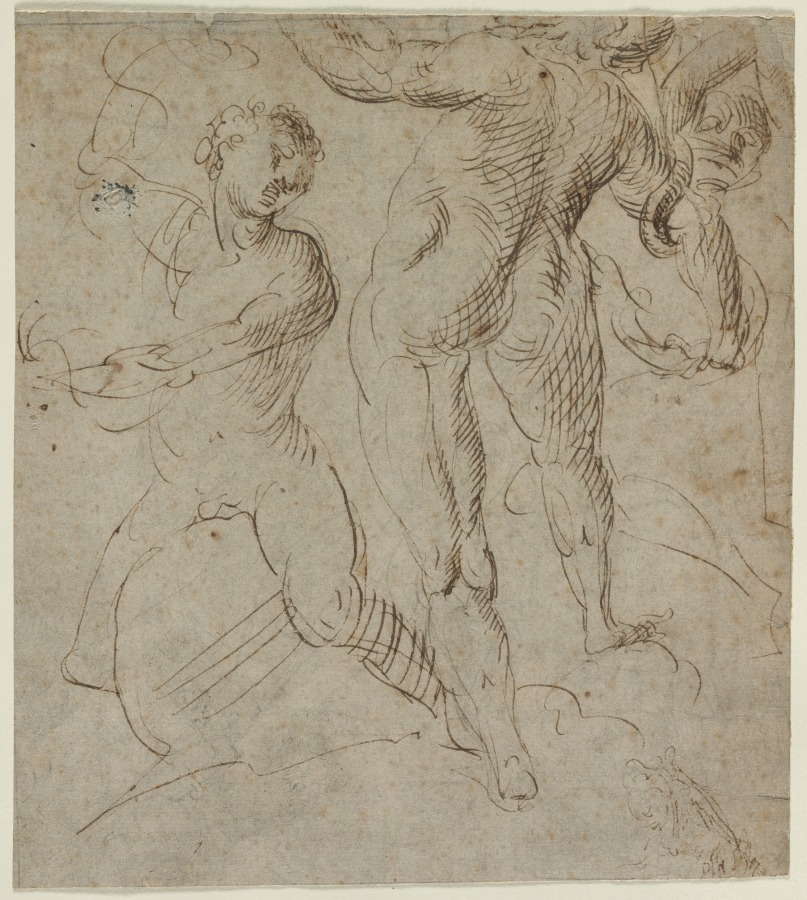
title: Laocoön (recto); Battle of the Milvian Bridge (fragment) (verso)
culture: Italy, 16th century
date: second half 16th Century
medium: pen and brown ink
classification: Drawing